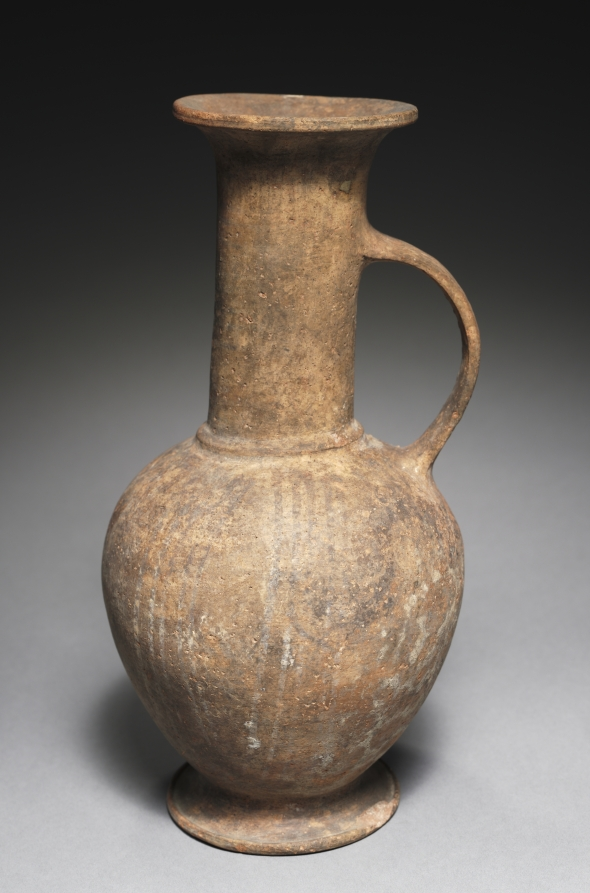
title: Jug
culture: Cyprus, late Cypriot II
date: c. 1450–1200 BCE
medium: base-ring ware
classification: Ceramic